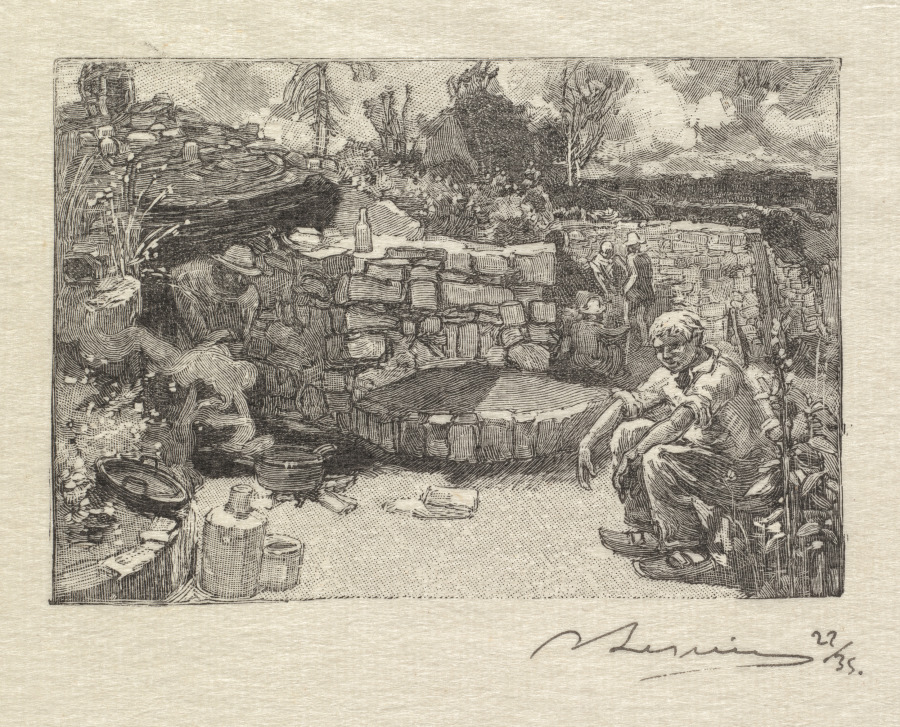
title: Fontainebleau Forest: Quarryman's Lodge (La Forêt de Fontainebleau: Une loge de carrier)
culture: France, 19th century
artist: Auguste Louis Lepère (French, 1849–1918)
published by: A. Desmoulins, Published in Revue Illustrée, 1887–90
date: 1890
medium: wood engraving from bound volume of 34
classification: Bound Volume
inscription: On block, upper right: A.L.; below image, lower right, in black ink: ALepère 22/35; on window mat, lower right, in graphite: Une loge de carrier